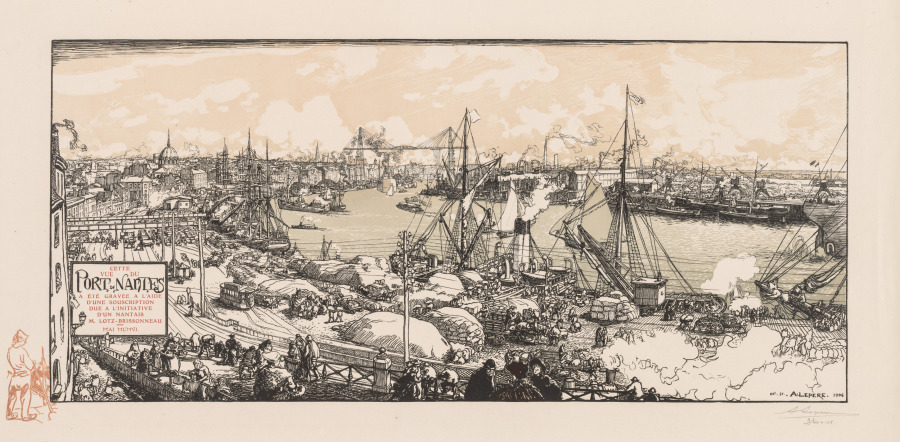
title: Le Port de Nantes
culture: rance, 19th-early 20th Century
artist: Auguste Louis Lepère (French, 1849–1918)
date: 1906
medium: chiaroscuro woodcut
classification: Print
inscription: Signed in pencil